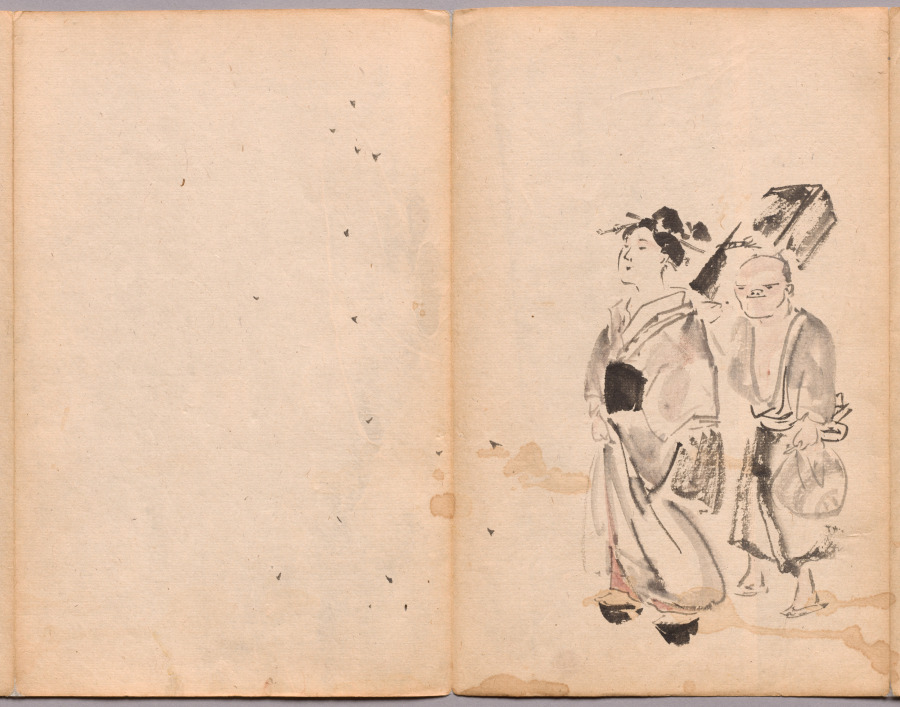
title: Woman and Servant from Sketch Album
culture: Japan, Edo period (1615–1868) to Meiji period (1868–1912)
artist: Kawanabe Kyōsai (Japanese, 1831–1889)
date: mid–late 1800s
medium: Accordion-style book of 26 double-leaves; ink and color on paper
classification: Bound Volume